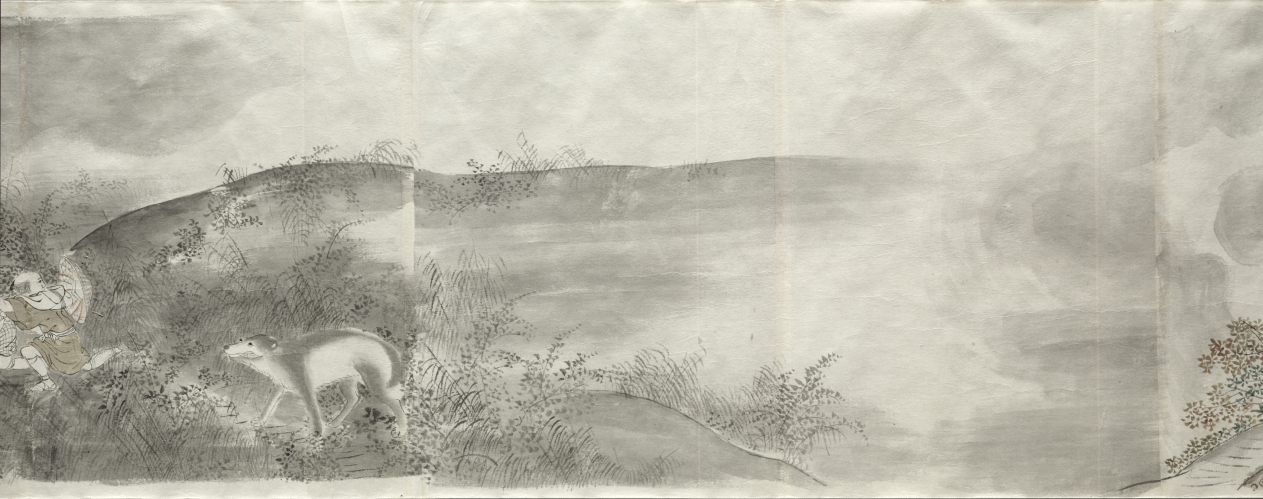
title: Sketch Copy of Natural Disasters, from the Seven Fortunes and Misfortunes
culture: Japan, Edo period (1615–1868) to Meiji period (1868–1912)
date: after 1773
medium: handscroll; ink and color on paper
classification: Painting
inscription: Signed: Gettcho; dated 1773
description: This unmounted handscroll is a copy of the first of a three-scroll set painted by Maruyama Ōkyo (1733–1795) for Buddhist monk Yujō (1723–1773). It depicts people's unfortunate encounters with forces of nature from wind to beasts. Ōkyo's realistic, contemporary imagery was meant to evoke a sense of recognition and empathy in viewers, shocking them into avoidance of possible punishments.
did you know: Notations that appear throughout the scroll indicate colors and other details of the original painting.